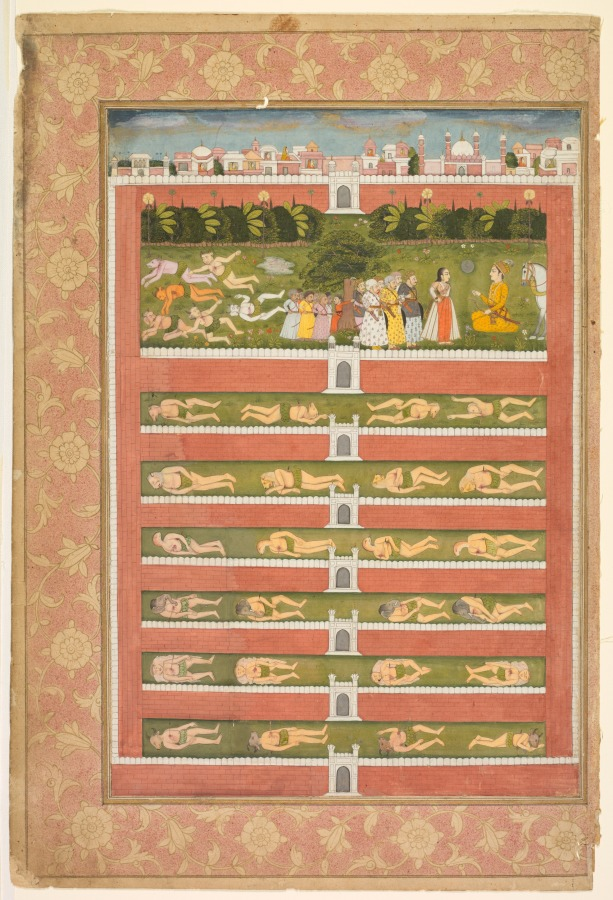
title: A Princess and Demons before a Nobleman: A Leaf from a Poetical Romance Relating to Shah Alam I (recto)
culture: Mughal India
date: c. 1710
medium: Gum tempera, ink, and gold on paper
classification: Painting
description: The source story of this painting remains enigmatic to scholars, but it includes a range of depictions of the “other”––from the foreign to the demonic. A prince kneeling in front of his horse addresses a lady; the moon in front of her face may identify her as Mahliqa (“moonlike” in Arabic), the Chinese princess identified by inscription on the adjacent page. A group of men whose eyes hang vertically stand behind her. Horned figures with grass skirts lie slain behind them, presumably killed by the kneeling prince conspicuously holding a bow. The city in the background, at the top of the painting, is populated solely by women, and its eight surrounding walls are interspersed with slain composite creatures wearing leaf skirts, which may identify them as bands of forest-dwellers, or tribal groups.